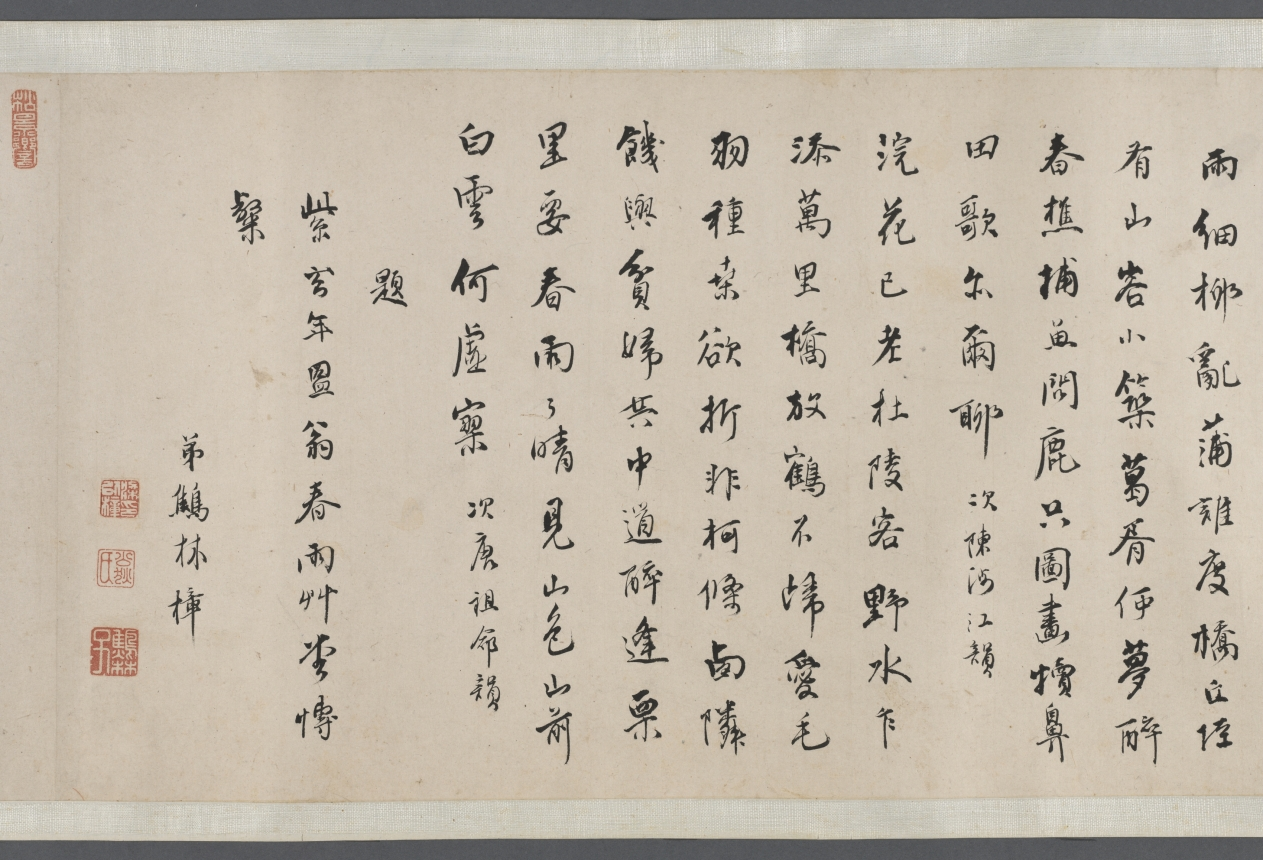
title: Spring Rain Thatched Hut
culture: China, Qing dynasty (1644-1911)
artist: Wang Jianzhang (Chinese, active 1621–1662)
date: 1650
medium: handscroll, ink on paper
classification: Drawing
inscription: Title by Wu Zhiying 吳芝瑛 (1868–1933), dated 1910.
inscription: 春雨草堂圖。庚寅仲春，為紫玄社兄畫於若耶溪上。 仲初王建章。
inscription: 12 colophons by Gong Weiliu’s 宮偉鏐 (1611–1680) contemporaries: Fang Gongqian 方拱乾 (1596–1667, jinshi of 1628); Jiang Cai 姜埰 (1607–1673); Liang Yizhang 梁以樟 (1608–1665); Du Shaokai 杜紹凱 (also named Du Jie 杜岕, 1617–after 1689), dated 1648; Zhao Kaixin 趙開心 (d. 1663), dated 1647; Zhao Erbian 趙而忭 (d. 1658); Yu Yaoguang 余耀光, dated 1649; Yao Quan 姚佺, dated 1648; Chen Taisun 陳台孫 (b. 1611, jinshi of 1640); (Monk) Shao 韶; Du Zhujin 杜祝進; and Tang Shi 唐時.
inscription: 此研田莊居士王建章為先太史紫元公所作春雨草堂圖也。居士字仲初，明崇禎間人，與先太史及惲香山相友善。喜畫佛像，自謂不讓李公麟。山水祖述董源，筆力雄健，有不可羈勒之概。香山稱其墨有五采，非世人所知。然性廉重，非同志不輕落筆，人得其寸圖尺縑，必相與忻賞，如獲蜼彝兕敦，非人世間物也！見先太史筆記，此圖寫雨景，而氣韻生動，勃勃於不能止。每一展覽，覺滿紙雲烟，墨瀋猶濕，如寫吾先人胸中未盡之邱壑也。圖後題詠，多一時名手，想見文采風流之盛。迄今二百餘年，舊德先疇，遺風未沫。吾子孫其永寶之，如與吾先人接謦咳於一堂，為感思之助，其敢作圖畫觀乎！同時香山亦有圖佚去己久，不知異日能為延津之合否。壬申長夏本昂重裝敬識。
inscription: Collectors' seals including: Gong Ben'ang 宮本昂 (1821–1874); Lian Qian 廉泉 (1868–1932); Wu Zhiying 吳芝瑛 (1868–1933)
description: With its striking simplicity, this painting captures the pure serenity of a private garden in the moist atmosphere of a spring morning on a small river. Painted in the style of Ni Zan, Wang Jianzhang dedicated this work to his patron-friend Gong Weiliu (1611-1680). Gong retired from government service after the fall of the Ming dynasty and constructed a garden-retreat at his native home in Taizhou, Jiangsu province. He invited scholars and poets from his literary society to contribute writings of his estate, which are here mounted together with the painting in this scroll.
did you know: Gong Weiliu, the owner of the estate portrayed here, had received his prestigious jinshi degree in 1643, but his official career was thwarted by the collapse of the Ming dynasty the following year.